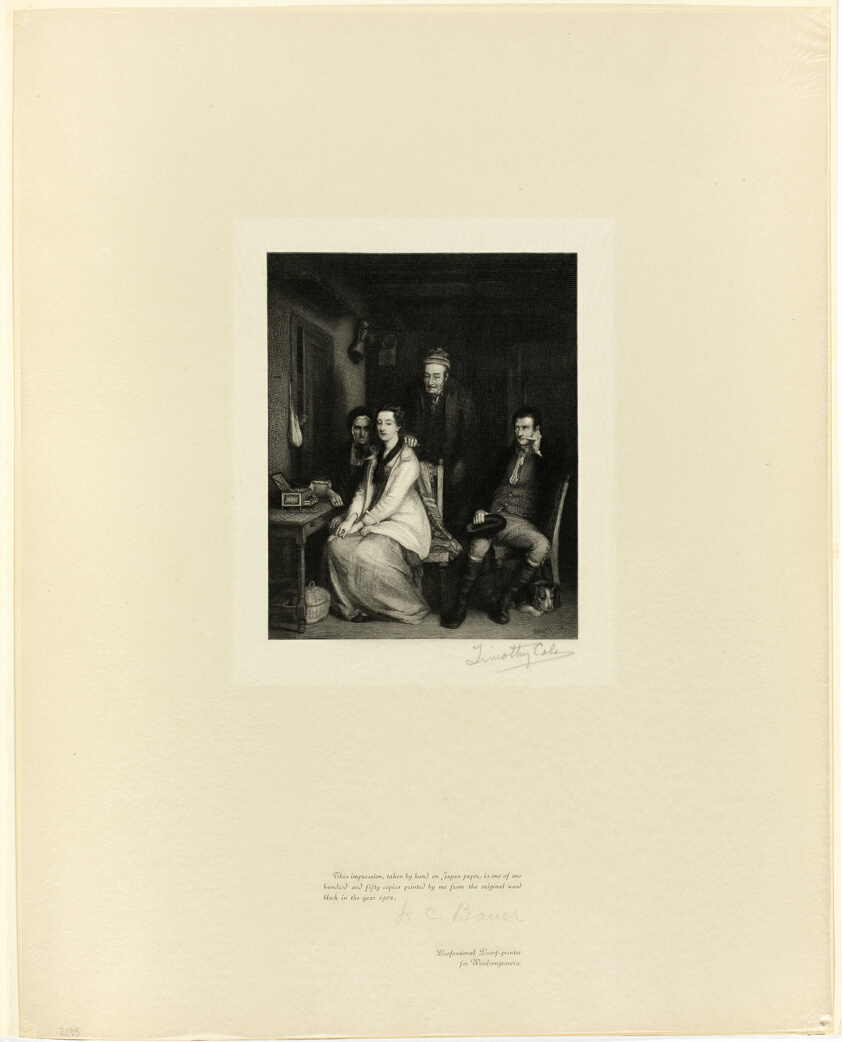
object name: Print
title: The Refusal, from Old English Masters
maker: Timothy Cole (American, born England, 1852-1931); after Sir David Wilkie (Scottish, 1785–1841)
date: 1900, printed 1902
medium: Wood engraving on chine paper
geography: United States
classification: wood engraving; print; prints and drawing